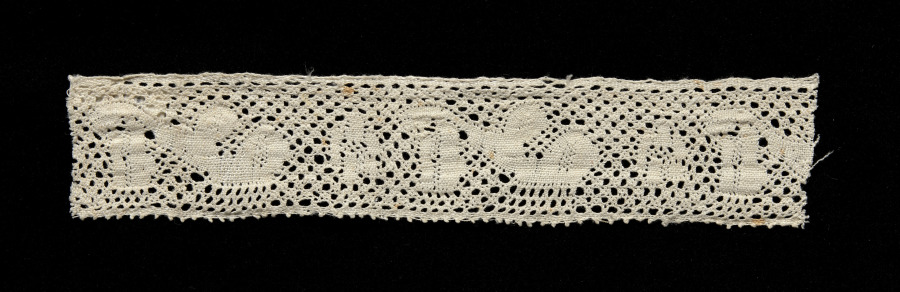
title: Lace Insertion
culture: Italy, Abruzzi, Pescocostanzo(?)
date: 1700s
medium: Bobbin lace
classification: Lace